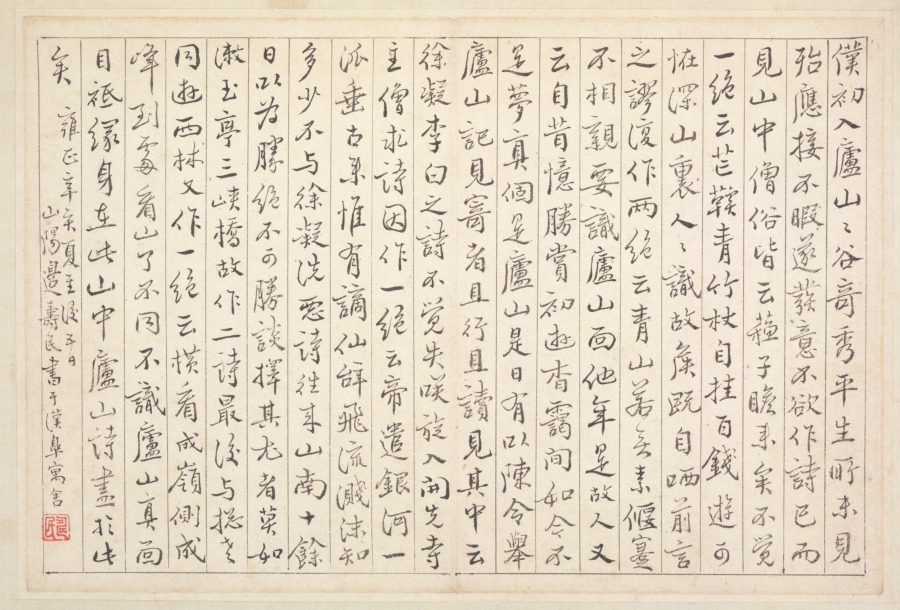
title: Album of Calligraphy and Paintings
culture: China, Qing dynasty (1644-1911)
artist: Bian Shoumin (Chinese, 1684–1752)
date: first half of the 1700s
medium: album leaf; ink and color on paper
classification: Painting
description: The artist Bian Shoumin is known for his depiction of wild geese, water, and reeds. The migrant birds in autumn and winter evoked, in the minds of the Chinese intelligentsia, a time of parting and sorrow.